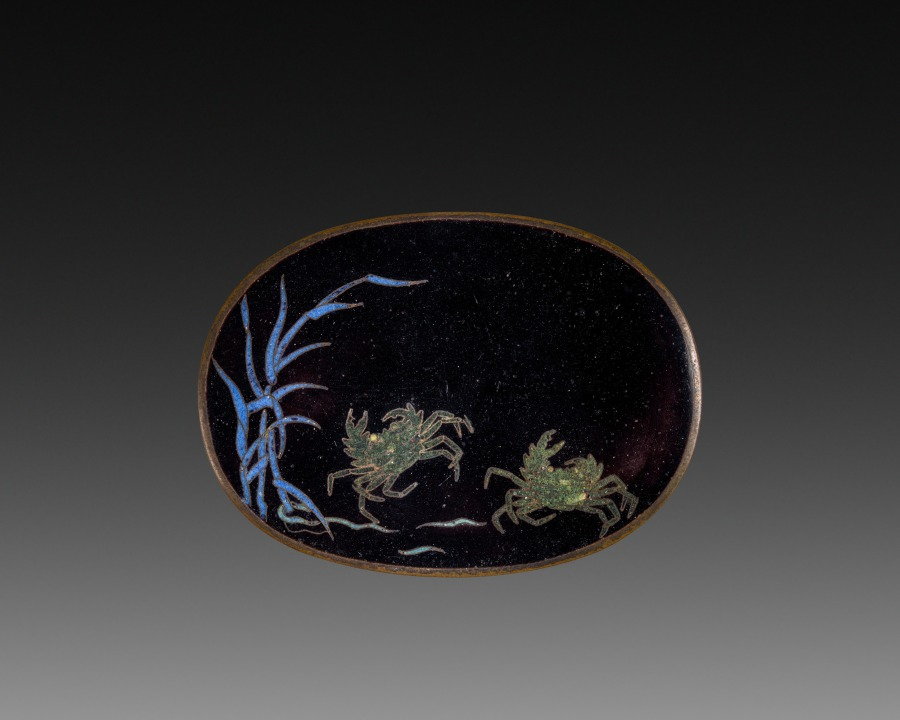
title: Belt Buckle with Crabs and Sea Plant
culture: Japan, Meiji period (1868–1912) or Taishō period (1912–26)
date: early 1900s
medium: cloisonne enamel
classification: Enamel